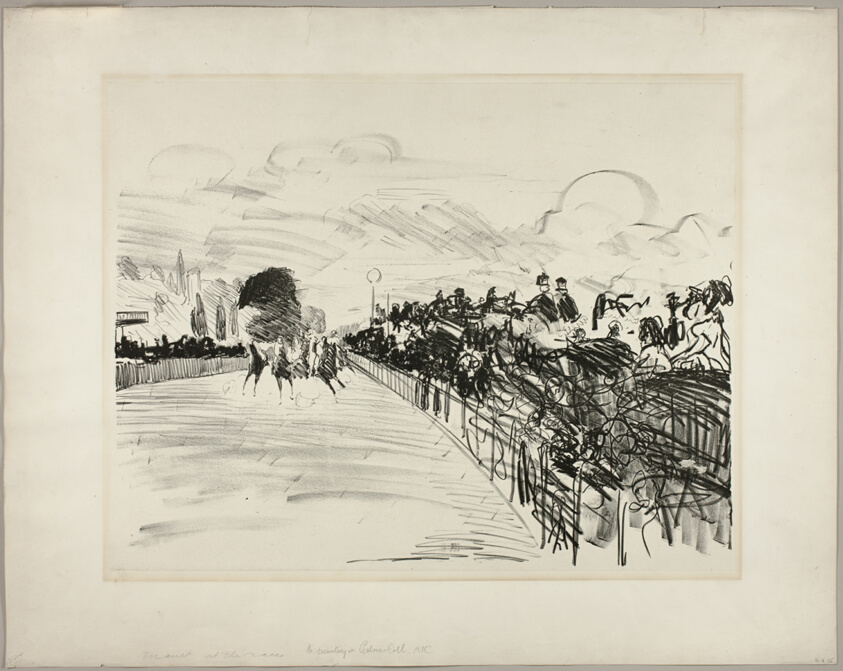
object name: Print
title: The Races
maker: Édouard Manet (French, 1832-1883)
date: 1865–72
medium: Lithograph in black on chine collé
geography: France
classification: lithograph; print; prints and drawing